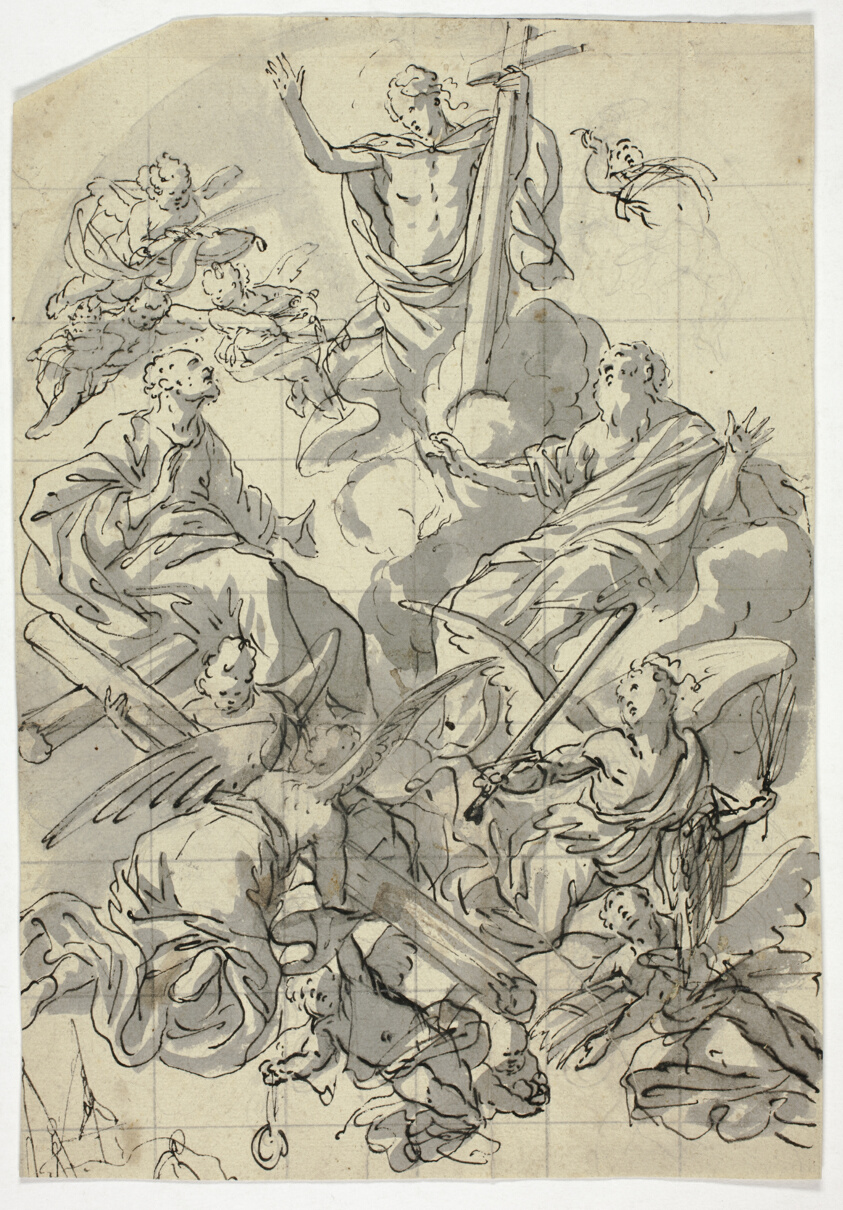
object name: Drawing and Watercolor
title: Christ in Glory with Saints Peter and Paul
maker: Johann Franz Caspar (Austrian, active 1723- d. 1728); or Style of Francesco Solimena (Italian, 1657-1747)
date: 1723-1728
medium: Pen and black ink with brush and gray wash, and touches of graphite, on cream laid paper, squared in graphite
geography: Germany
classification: drawings (visual works); prints and drawing